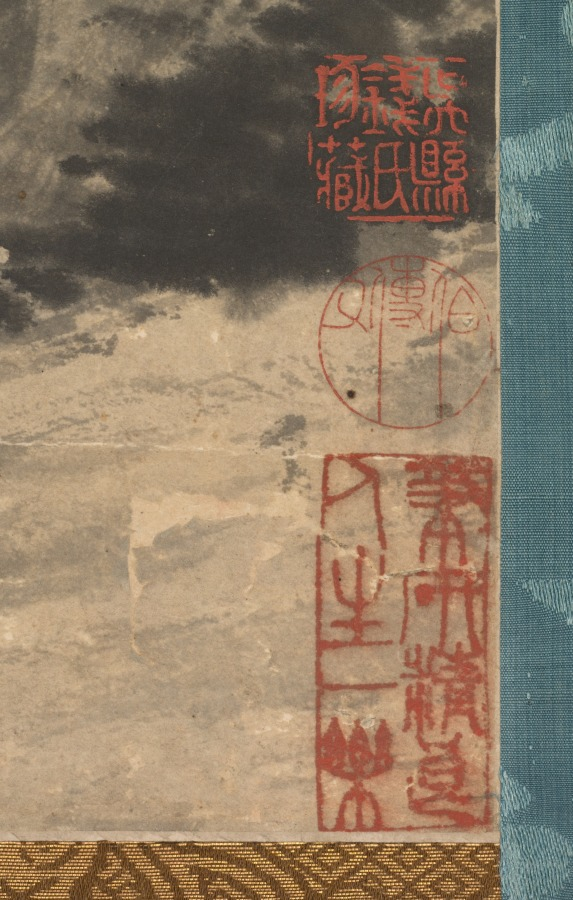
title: Looking for a Monastery in the Misty Mountains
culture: China, Ming dynasty (1368–1644)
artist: Chen Chun (Chinese, 1483–1544)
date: 1500–1544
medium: hanging scroll, ink on paper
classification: Painting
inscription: Artist's inscription, signature, and 2 seals: Row after row of misty trees envelop the Buddhist Monastery./ But the rustic who comes to find it will not lose his way./ Just across the wooden bridge, the dusty world is cut off;/ Among the countless falling petals, birds are singing confusedly. Daofu 道複 composed [this]. [seals] Fufu shi 復甫; Baiyang shanren 白陽山人. trans. WKH/LYSL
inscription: 3 additional unidentified seals.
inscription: 1 additional unidentified seal on the back of the mounting.